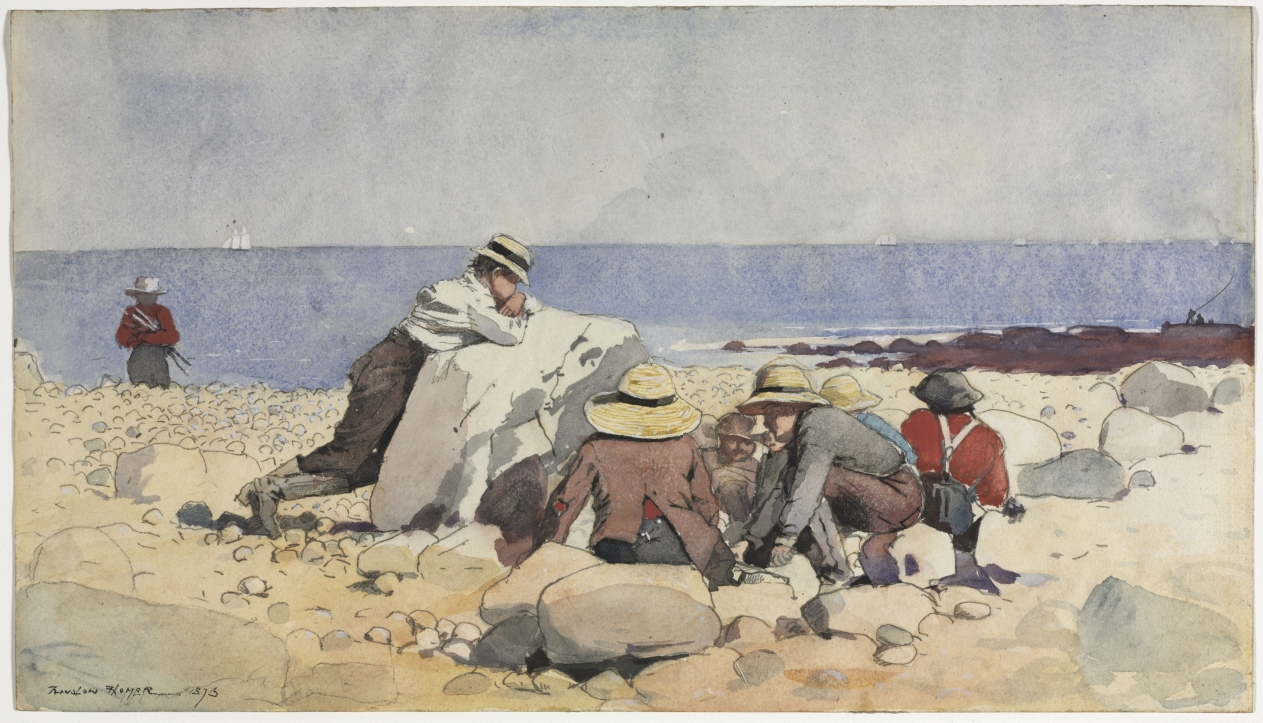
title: A Clam-Bake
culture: America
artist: Winslow Homer (American, 1836–1910)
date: 1873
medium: watercolor, gouache, and graphite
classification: Drawing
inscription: signed, lower left, ing black ink: WINSLOW HOMER 1873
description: During the first part of his career, Winslow Homer supported himself as an illustrator, but in the early 1870s he found that he could make a good living through the sale of his watercolors. His early watercolors, such as this one of boys on a beach at Gloucester, Massachusetts, show a tentative use of the technique and often have the effect of colored line drawings. Homer later combined the composition of this watercolor with other sketches to produce the illustration A Clam-Bake, which appeared in Harper's Weekly on August 23, 1873.